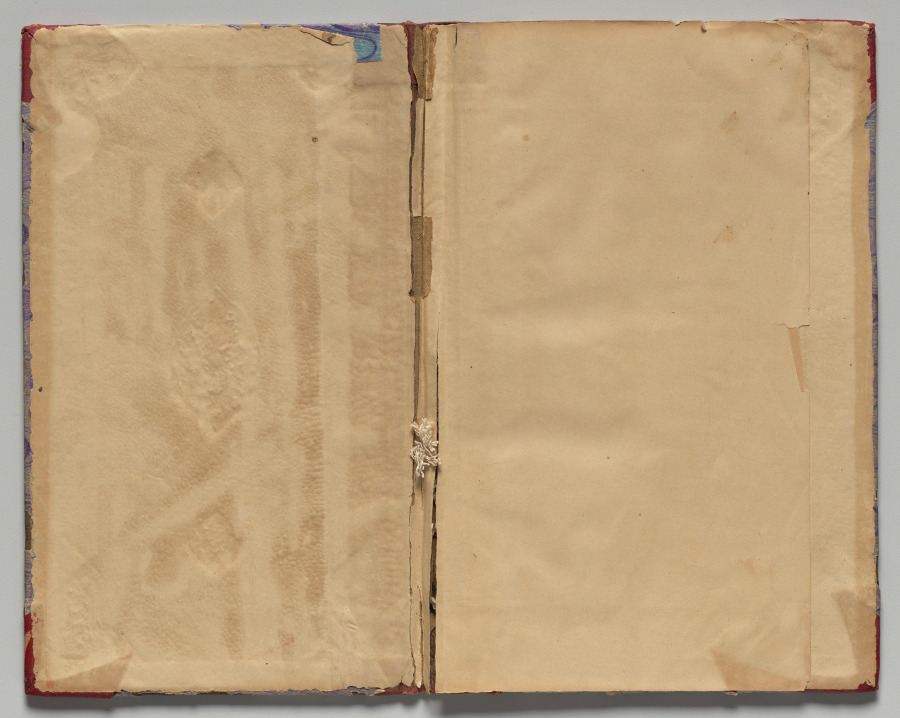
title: Mirror of Holiness (Mir’at al-quds) of Father Jerome Xavier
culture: Mughal India, Allahabad, made for Prince Salim (1569–1627)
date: 1602–4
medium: 24 full size illustrations with 160 folios of text; gum tempera, ink, and gold on paper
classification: Manuscript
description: Father Jerome Xavier (1549–1617) of the Society of Jesus, also known as the Jesuit order of Catholic priests, spent 19 years as a guest at the Mughal court from 1595 until 1614. While in residence he learned the Persian language so that he could engage in theological discussions in the courts of Akbar and his successor, Jahangir. When Akbar requested a biography of Jesus, Father Jerome wrote the Mir’at al-quds in Persian prose. This text relates his version of the life and miracles of Jesus based on a number of canonical and apocryphal sources. He emphasized aspects of the life of Jesus that he thought would appeal to Akbar in the hopes of winning the emperor’s conversion to Christianity.